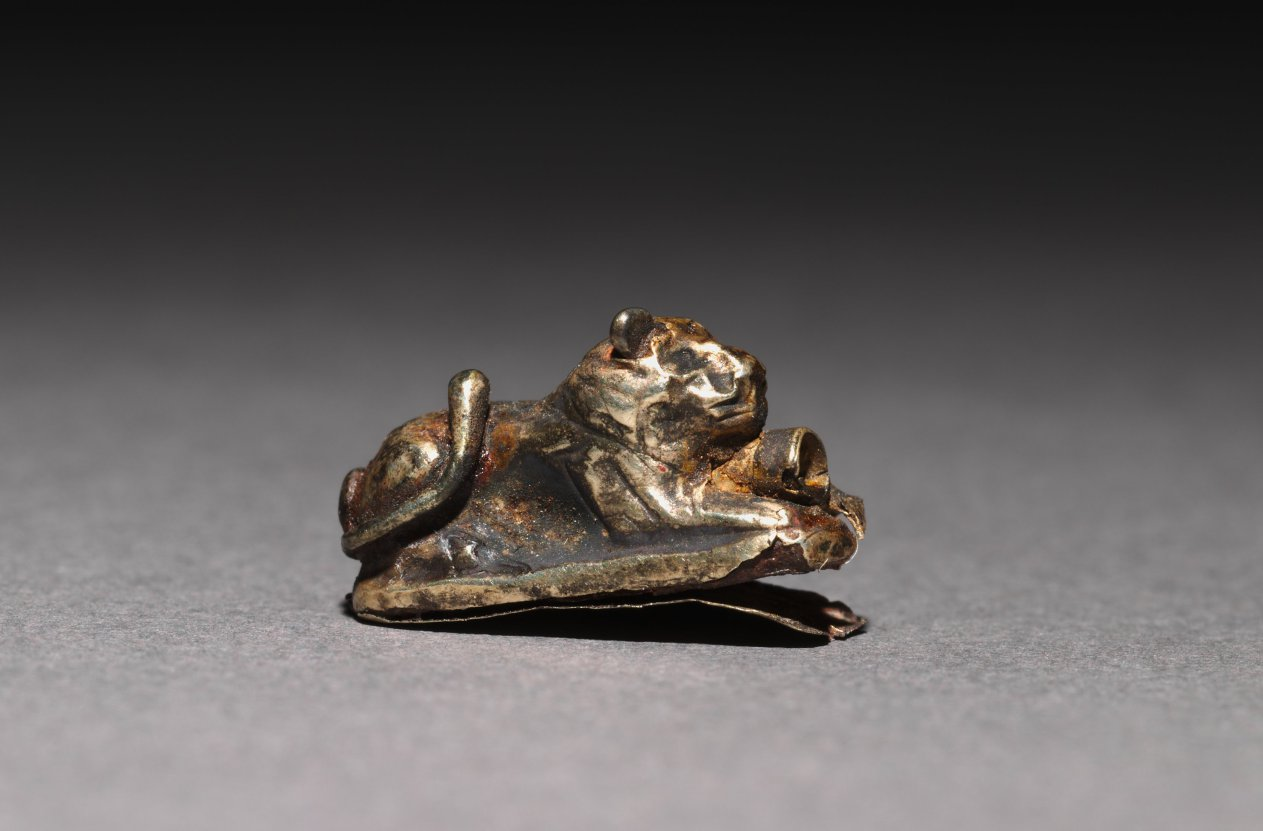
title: Recumbent Lion Bead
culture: Egypt, Middle Kingdom (2040–1648 BCE), Dynasty 12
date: 1980–1801 BCE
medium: electrum over a clay-bulked resin core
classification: Amulets